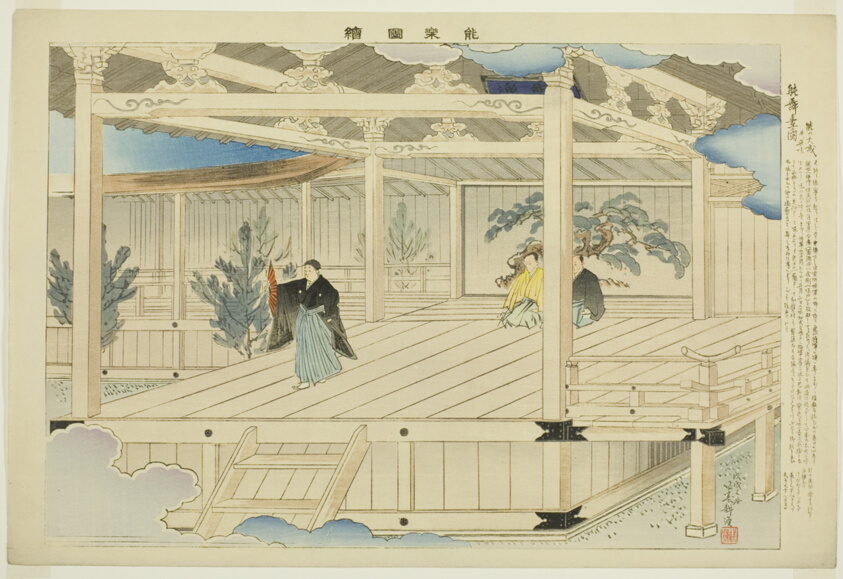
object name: Print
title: Frontispiece, from the series "Pictures of No Performances (Nogaku Zue)"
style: Japanese (culture or style)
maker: Tsukioka Kogyo; Japanese, 1869-1927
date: 1898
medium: Color woodblock print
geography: Japan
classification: woodblock print; print; asian art